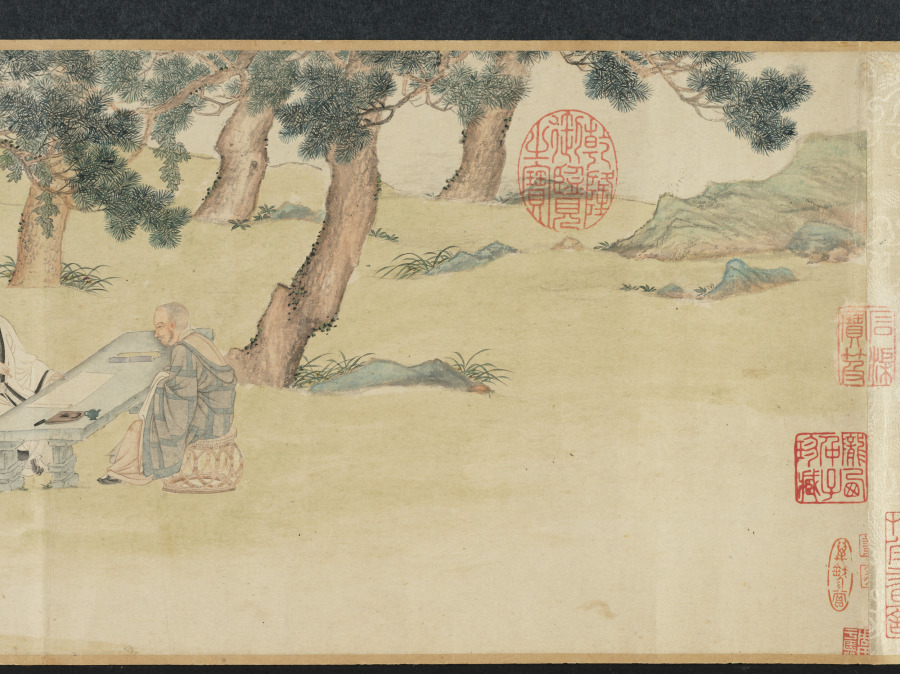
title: Zhao Mengfu Writing the Heart (Hridaya) Sutra in Exchange for Tea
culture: China, Ming dynasty (1368–1644)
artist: Qiu Ying (Chinese, 1494–1552)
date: 1542–43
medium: handscroll, ink and light color on paper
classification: Painting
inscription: Inscription accompanying text of "Heart" sutra, by Wen Zhengming 文徵明 (1470-1559): Zhengming 徵明, written in a boat at Kunshan 崑山, on the twenty-first day of the ninth month, in the renyin 壬寅 year, the twenty-first year of the Jiajing era [1542].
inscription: Colophon by Wang Shih-mou: Chou Yü-shün [Feng-lai] of K'un-shan was a scholarly, refined connoisseur of antiquities. He had acquired the poem written by Chao Ch'eng-chih [Chao Meng-fu] about the exchage of tea for Chao's calligraphy of the Prajna sutra. But the sutra itself, also written by Chao Meng-fu, is lost. He therefore asked Ch'iu Shih-fu [Ch'iu Ying] to do a painting and had Wen Cheng-ming, the artist-in-attendance, write the Hridaya Sutra in the "small, regular" style for replacement. Both works are so excellent that even Chao Meng-fu himself would certainly applaud if he should be reborn to see them. I, Shih-mou, had gotten possession of this scroll from the family of Chou Yü-shün, and since it was so wonderfully matched with one of the treasures in my collection. the Hridaya Sutra written by Chao Meng-fu for Priest Li in "running script," like the reuniting of two halves of a jade pi, I completed the scroll with the several colophons written for the "tea-exchange" poem. I did this because the painting of Ch'iu Ying and the calligraphy of Wen Cheng-ming are definitely masterpieces by themselves with absolutely no need to depend on any of the colophons written for the Chao Meng-fu poem. Furthermore, the two sons of Wen Cheng-ming, Shou-ch'eng [Wen P'eng] and Hsiu-ch'eng [Wen Chia]. have each written a colophon explaining the reason for replacing the calligraphy. As their writings are both acceptable for high standard, I didn't want to throw them away. [So by separating these into two scrolls] I was able to get two complete works of art in one clever stroke. I was quite pleased with myself, and hope that those who see this scroll shall not get suspicious because of the missing colophons. Wang Shih-mou wrote in his Jih-sun-chai study, on the first day of the tenth month, in the chia-shen year of the Wan-li era [1584].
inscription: Colophon by Wen P'eng: I-shao [Wang Hsi-chi] wrote in exchange for a flock of geese. Su Tung-po wrote in exchange for meat. Both episodes have become legends of a thousand years. Sung-hsüeh [Chao Meng-fu] "teased" Priest Kung for tea, and the story was immediately immortalized in the poems by all the famous scholars of the times. Indeed, how could one say his humor and elegance are not equal to the ancient worthies? Unfortunately, the poetry has survived but the writing of the sutra is lost. Yü-shün [Chou Feng-lai] therefore asked my father to make up the writing and so here is the complete work of art. Respectfully inscribed by Wen P'eng in the mid-summer of 1543.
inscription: Colophon by Wen Chia: Sung-hsüeh [Chao Meng-fu], in exchanging tea leaves for his writing of the Prajna, had put himself in the company of Yu-chün [Wang Hsi-chih] who exchanged geese for his writing of the Huang-t'ing sutra [the Yellow Chamber, or the Wai-ching ching, a Taoist text attributed to the Yellow Emperor]. However, was this romantic and cultivated gesture really intended for such small things? Actually, he was only proud that the excellence of his calligraphy had made him worthy to be the successor of the Ch'in Dynasty master. Since, very unfortunately, Chao Meng-fu's writing [of the Prajna] was already lost, my father therefore agreed to replace it, and did the calligraphy in the style of the Yellow Chamber. In addition, Yu-shün [Chou Feng-lai] had asked Mr. Ch'iu Shih-fu [Ch'iu Ying] to do a painting of the sutra writing story in the style of Li Lung-mien at the head of the scroll. Now it would seem the entire episode should go down in history for immortality. Respectfully recorded by Wen Chia, on the eighth day of the eighth month, in the year of k'uei-mao [1543]. trans. WKH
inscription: 4 colophons and 23 seals: 1 colophon, dated 1543, and 2 seals of Wen Peng (1498-1573); 1 colophon, dated 1543, and 2 seals of Wen Chia (1501-1583); 1 colophon, dated 1584, and 3 seals of Wang Shih-mou (1536-1588); 2 seals of Chou Feng-lai (16th c.); 3 seals of Sung Lo (1634-1713); 5 seals of the Ch'ien-lung emperor (r. 1736-95); 1 colophon, dated 1902, and 1 seal of Fei Nien-tz'u (1885-1905); 4 seals of Wan-go H. C. Weng (b. 1918); 1 seal unidentified.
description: The Yuan dynasty calligrapher Zhao Mengfu (1254–1322) is said to have transcribed the Heart Sutra for a certain priest named Li in exchange for tea. Later, during the Ming dynasty, the professional painter Qiu Ying from Suzhou painted this scene for his patron. Here, Zhao Mengfu holds a brush and has a piece of paper laid out before him. On the table is an ink stone, an ink stick, and a small water dropper. Drops of water would dissolve the ink stick into liquid ink when it was ground on the flat square stone.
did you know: Qiu Ying was born to a peasant family, but his natural talent led him to a successful career as a professional painter with wealthy patrons.